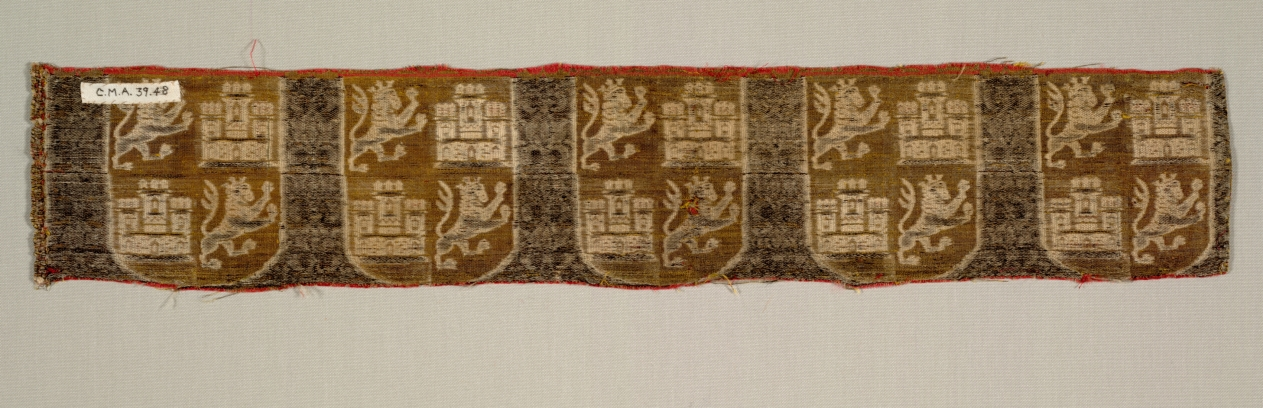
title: Lampas with heraldry of Castile and León, from a royal Christian robe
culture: Spain, Granada, Nasrid period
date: 1200–1325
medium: lampas: silk and gold thread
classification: Textile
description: Opulent gold thread forms heraldic shields of a Spanish king on a palmette ground. The shield bears the heraldic device of Castile and Leon, the castle and lion, which had decorated imperial Spanish garments for several centuries. The use of coats of arms was a European convention that was never adopted by the Muslims.